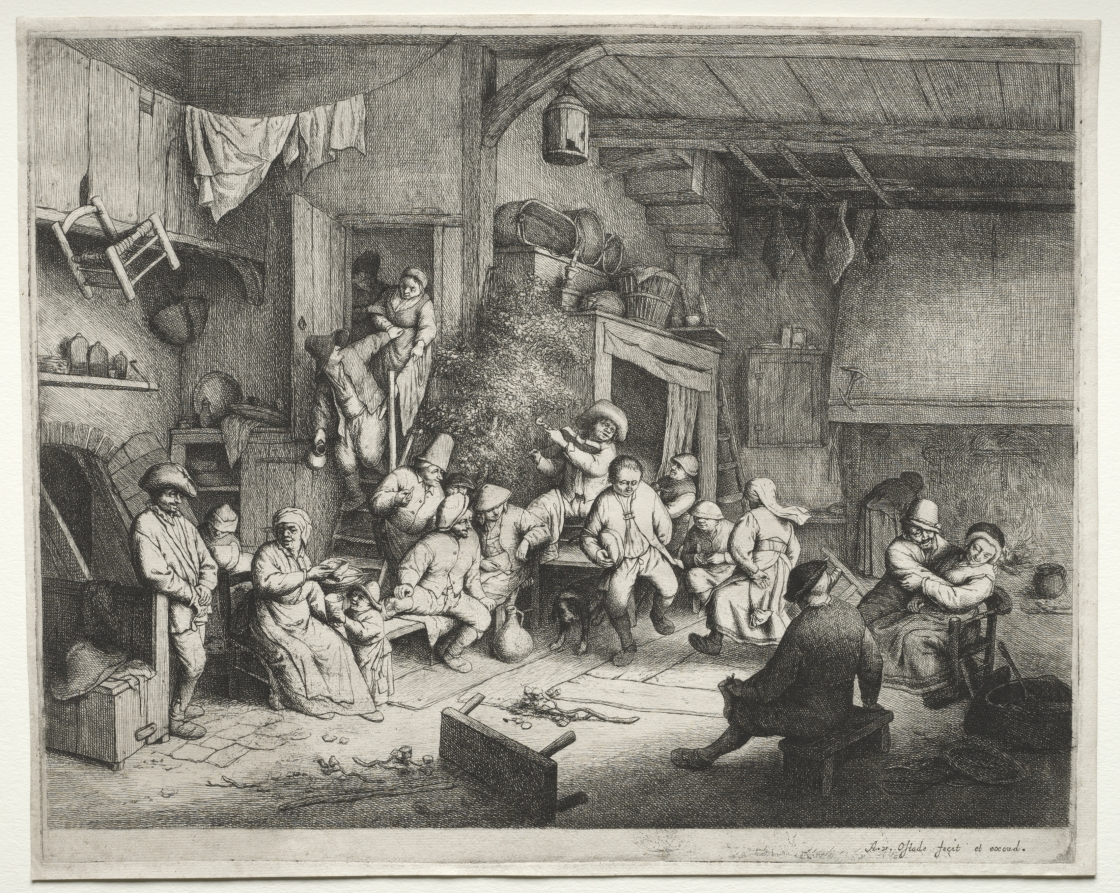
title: The Dance in the Inn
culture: Netherlands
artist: Adriaen van Ostade (Dutch, 1610–1684)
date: 1652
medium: etching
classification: Print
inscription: With the stomping figures and gathering of drinking, smoking, and canoodling revelers, Ostade captured the raw spirit of tavern music and the earthy vitality of peasant songs. The tree visible behind the fiddler suggests that this may be a May Day celebration, whose festivities heralded the arrival of spring.